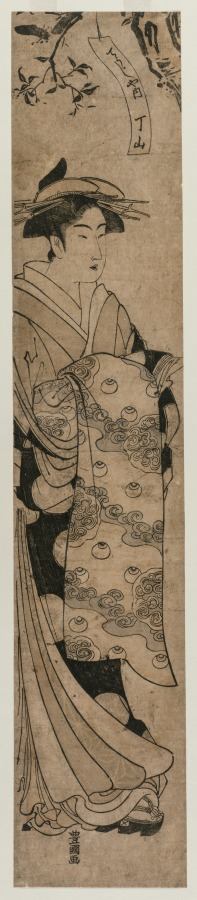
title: The Courtesan Chozan of the Chojiya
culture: Japan, Edo period (1615–1868)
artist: Utagawa Toyokuni (Japanese, 1769–1825)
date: c. 1790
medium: color woodblock print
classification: Print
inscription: Signature: Toyokuni ga